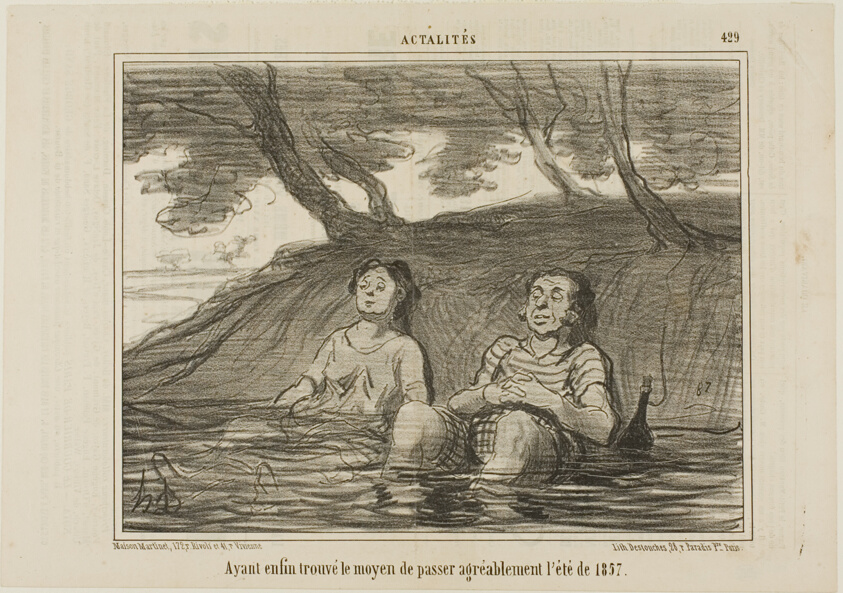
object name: Print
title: Having finally found the solution to spend the summer of 1857 in a pleasant way, plate 429 from Actualités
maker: Honoré Victorin Daumier; French, 1808-1879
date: 1857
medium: Lithograph in black on ivory wove paper, with letterpress verso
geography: France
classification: lithograph; print; prints and drawing